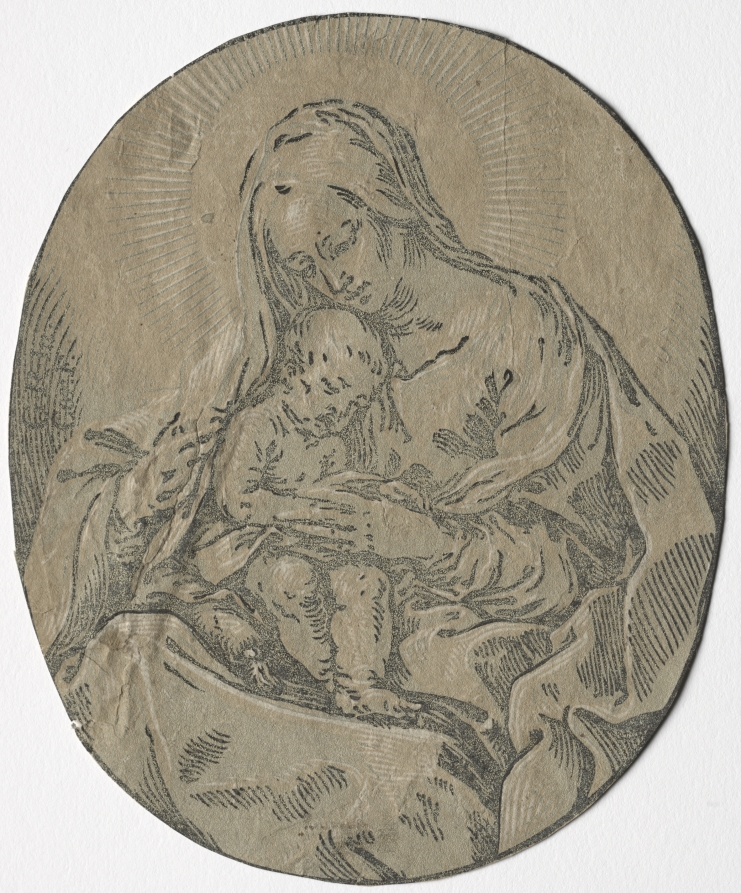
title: Madonna and Child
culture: Italy, 17th century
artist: Bartolommeo Coriolano (Italian)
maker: after Guido Reni (Italian, 1575–1642)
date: c. 1630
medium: chiaroscuro woodcut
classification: Print